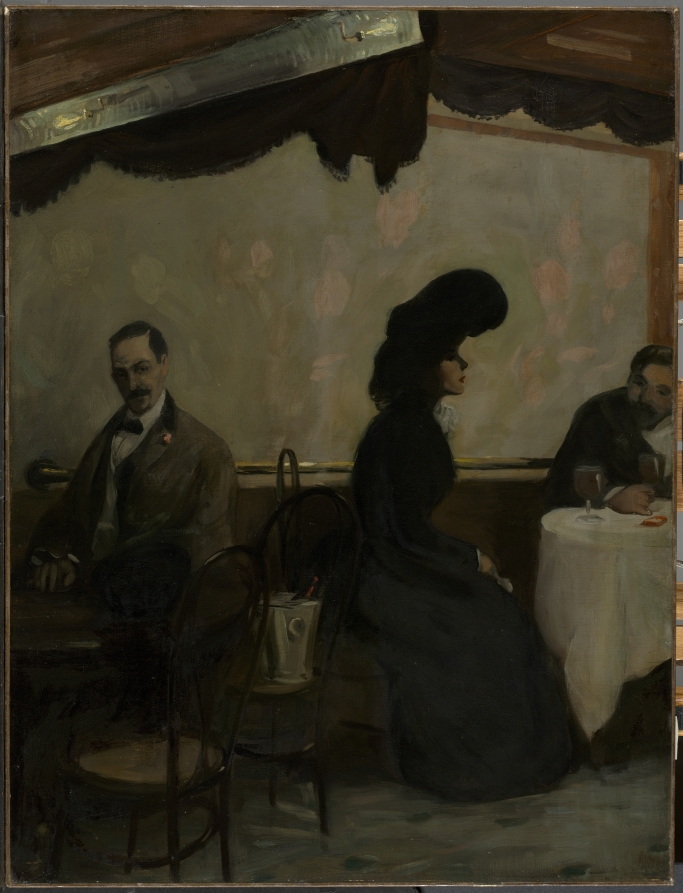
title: The Rathskeller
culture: America, early 20th Century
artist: John Sloan (American, 1871–1951)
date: 1901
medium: oil on canvas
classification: Painting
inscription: Signed lower right: "John / Sloan [JS in monogram]"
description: Economic differences infuse Sloan’s scene of patrons at a Philadelphia bar. Here, a working-class woman sharing a beer with a companion captures the attention of a lone man who has ordered the more costly champagne. One contemporary critic characterized this wealthier man as “a spider watching for the fly.”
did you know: Sloan worked as an illustrator for various newspapers before becoming a professional painter and printmaker.